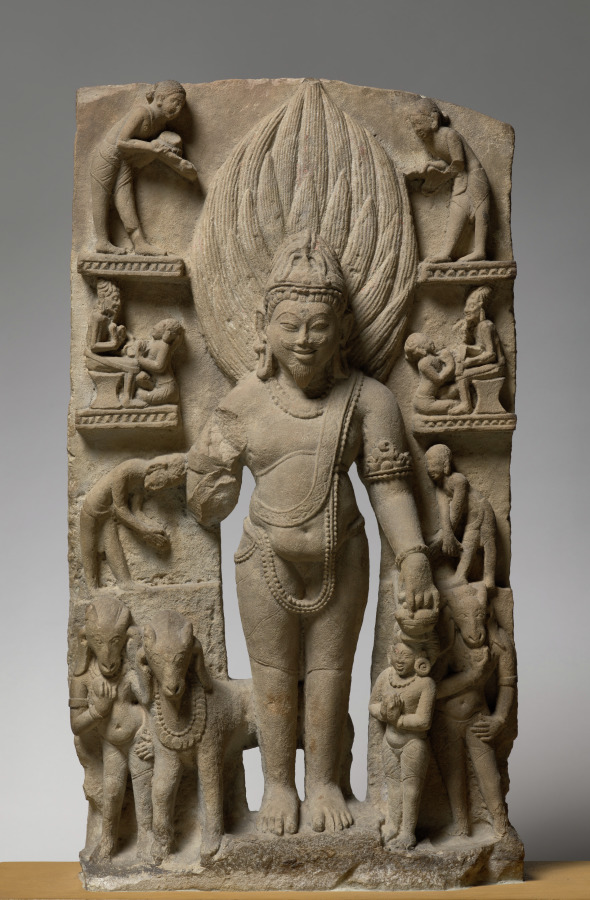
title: Agni, God of Fire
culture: India, Uttar Pradesh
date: c. 1000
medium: sandstone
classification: Sculpture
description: The Hindu god Agni, with flames rising behind him, is the figural form of the sacrificial fire, central to religious practice in India since the early second millennium BC. Agni’s mount is the goat, and together they preside over the Southeast. In the upper registers, Brahmans perform fire sacrifice, preach to disciples, and practice "hot yoga."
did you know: This sculpture is on the cover of the Penguin Classics edition of the Hindu "Laws of Manu."